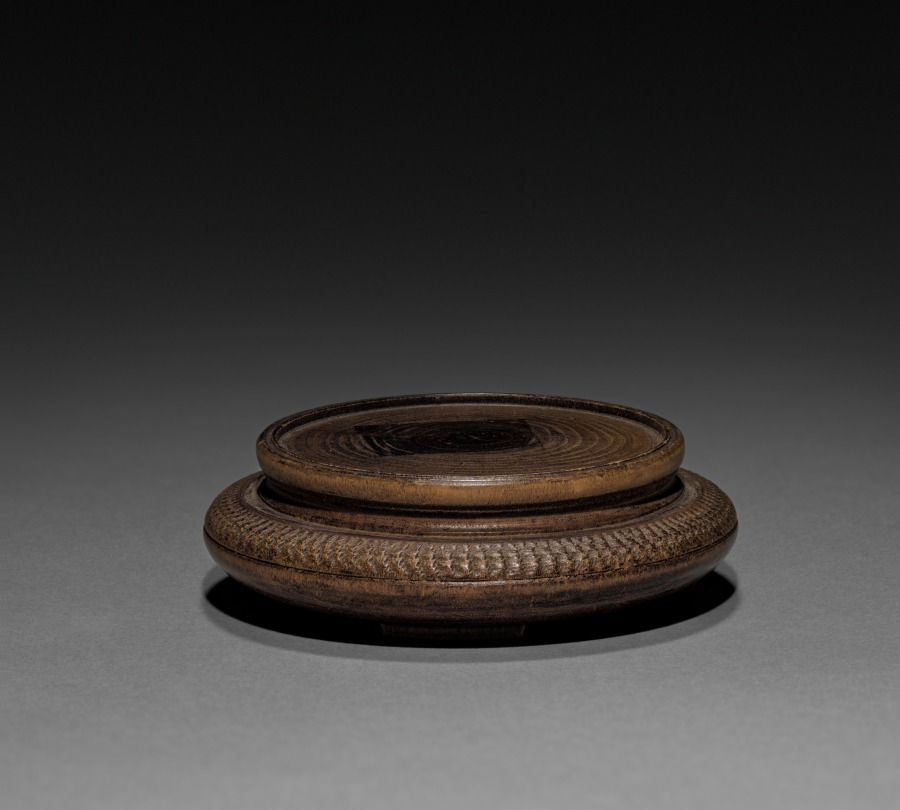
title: Kneeling Boy (base)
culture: Japan, Meiji period (1868–1912)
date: early 1900s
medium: wood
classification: Ivory